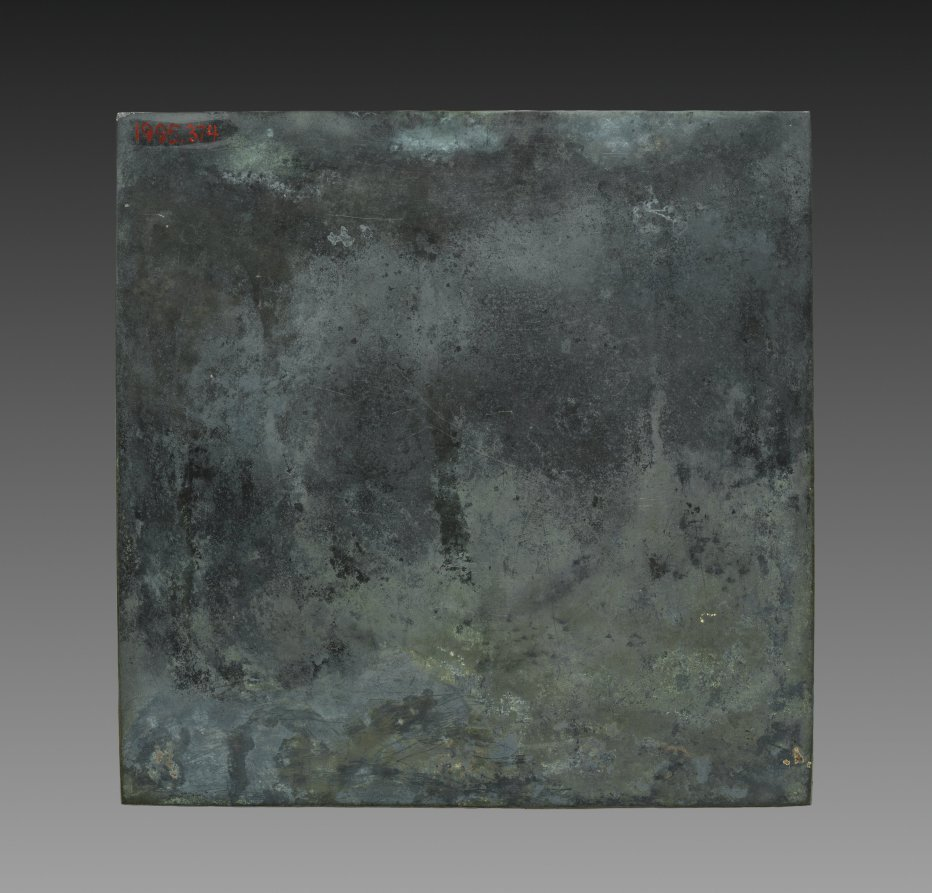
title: Square Mirror with Two Phoenixes and Floral Sprays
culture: China, Northern Song dynasty (960-1127)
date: 960–1127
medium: bronze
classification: Metalwork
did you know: The Chinese phoenix is known as Fenghuang, mythological birds in East Asian mythology that reign over all other birds.